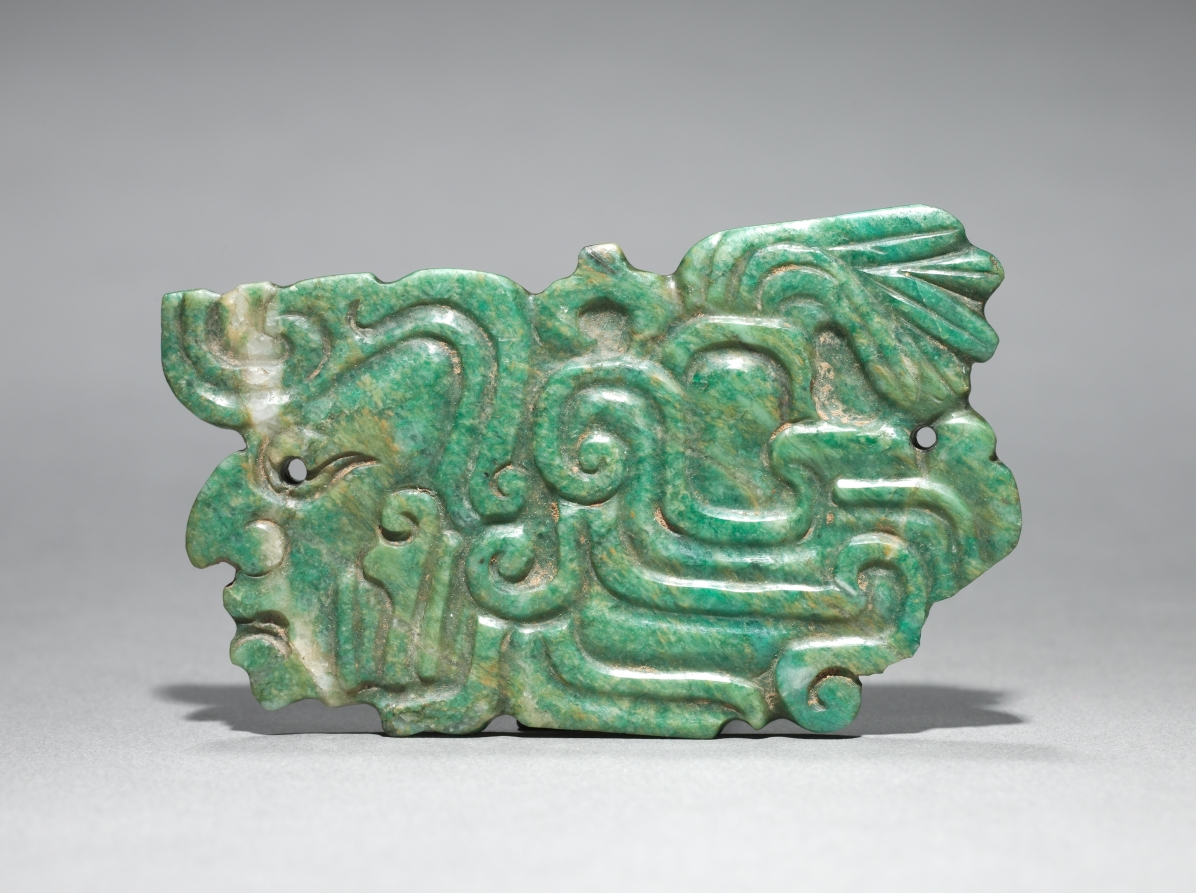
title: Ornament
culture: Mexico or Central America, Maya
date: 250–900 CE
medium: greenstone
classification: Stone